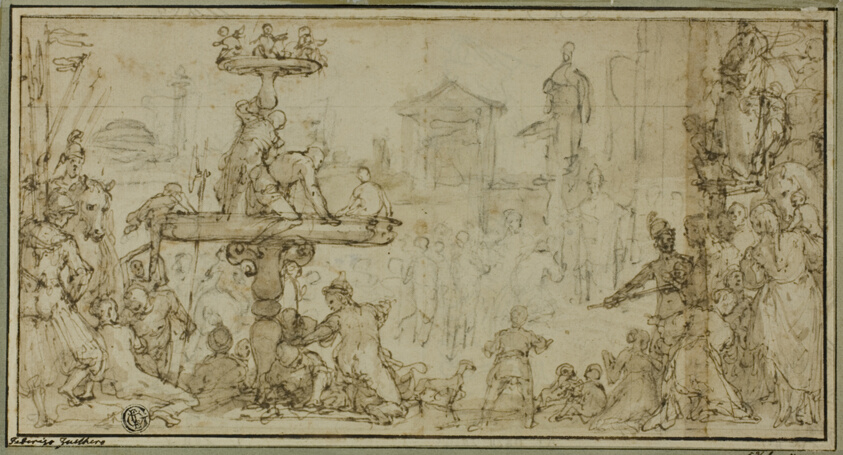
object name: Drawing and Watercolor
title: A Pope Receiving a Dignitary in a Public Place (recto) Caricatures of Heads (verso)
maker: Federico Zuccaro (Italian, 1540/41-1609)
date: c. 1582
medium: Pen and brown ink, with brush and brown wash and black chalk, on ivory laid paper, laid down on cream laid paper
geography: Italy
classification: ink with wash; drawings (visual works); prints and drawing